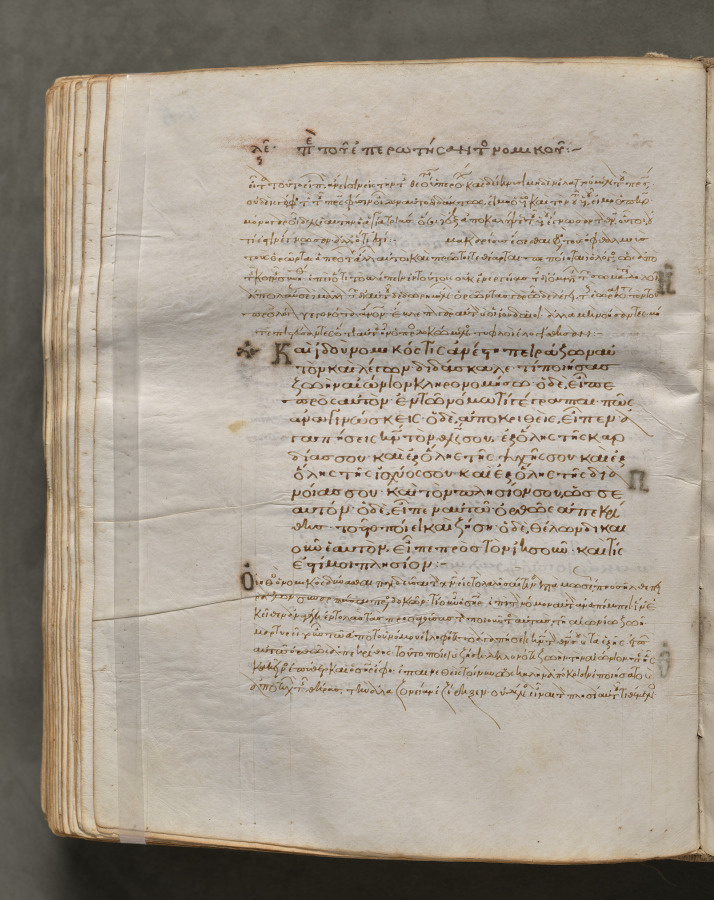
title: Text, folio 255 (verso), from a Gospel Book with Commentaries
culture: Byzantium, Constantinople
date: c. 1000–1100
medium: ink, tempera, and gold on vellum; leather binding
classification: Bound Volume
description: Each of the four gospels in this book opens on a page with brilliantly illuminated borders depicting the author of the text as well as birds—principally peacocks, symbols of the immortality of the soul—and fountains, representing the fountain of life and the salvation of the soul. This volume consists of 428 leaves with texts in Greek. Its level of sophistication suggests that it was probably written and decorated in a monastery in Constantinople.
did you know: Gospel books were carried in procession through Byzantine churches.